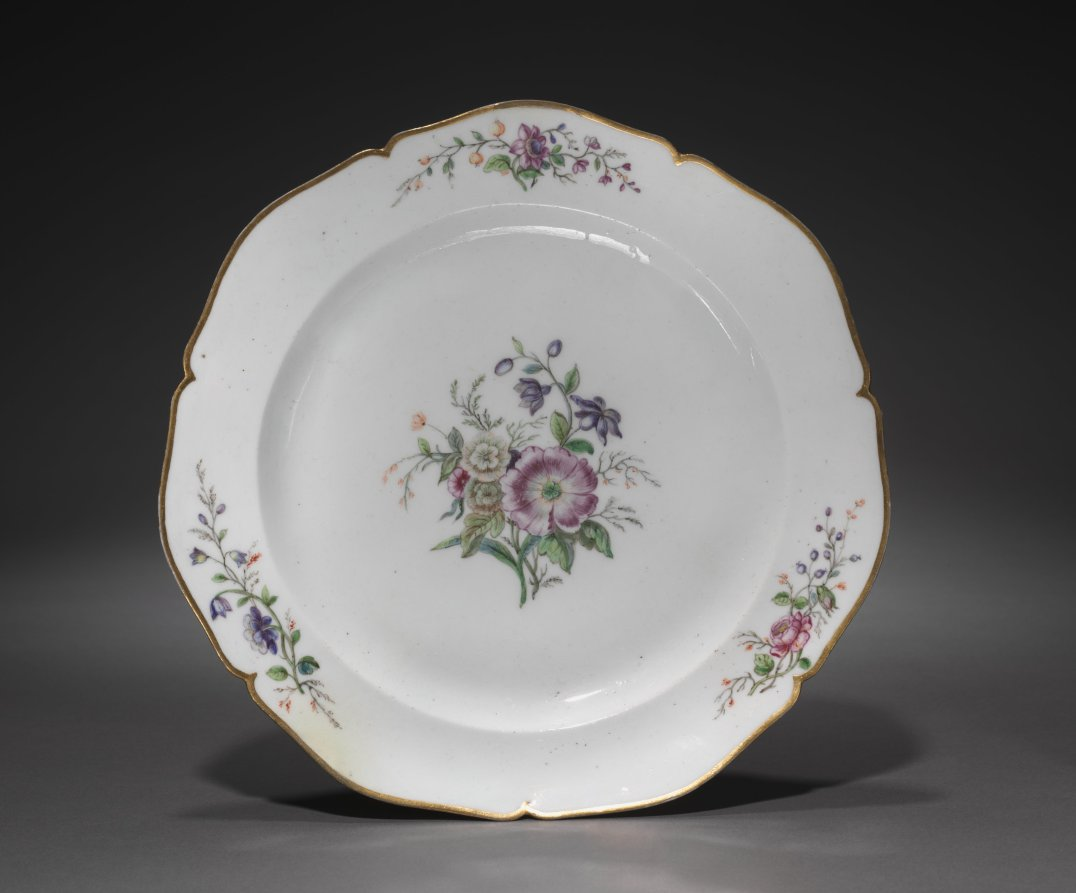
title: Plate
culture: France, Vincennes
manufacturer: Vincennes Porcelain Factory (France, 1740–56)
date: c. 1748–51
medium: porcelain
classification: Ceramic